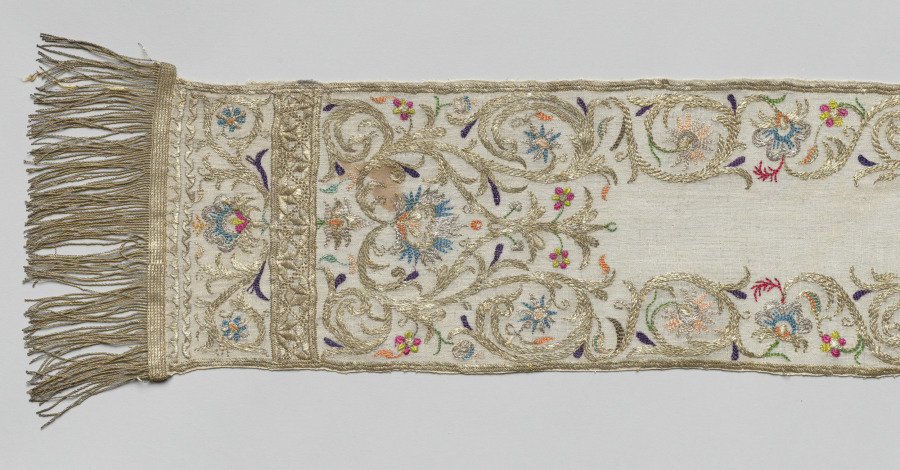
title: Headdress (beniqa)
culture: Africa, North Africa, Algeria, Algerian embroiderer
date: 1800s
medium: Linen, silk, and metal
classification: Embroidery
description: Beniqa were stylish headdresses that women wore when visiting the hammam (steam bath). The linen fabric absorbed the damp from their wet hair. With its gold and silver metal thread, shimmering spangles, and brightly colored threads forming flowers and vines, this beniqa was a ceremonial garment worn for the ritual bath before a Jewish woman’s wedding; it was also part of her dowry. After toweling off her hair, a woman made two braids, which she would then twist into the cap’s fabric and tie on her head, with the gold-fringed ends trailing down.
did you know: Slender gray lines made in pencil or chalk trace out unstitched designs on this elaborate ritual cap.